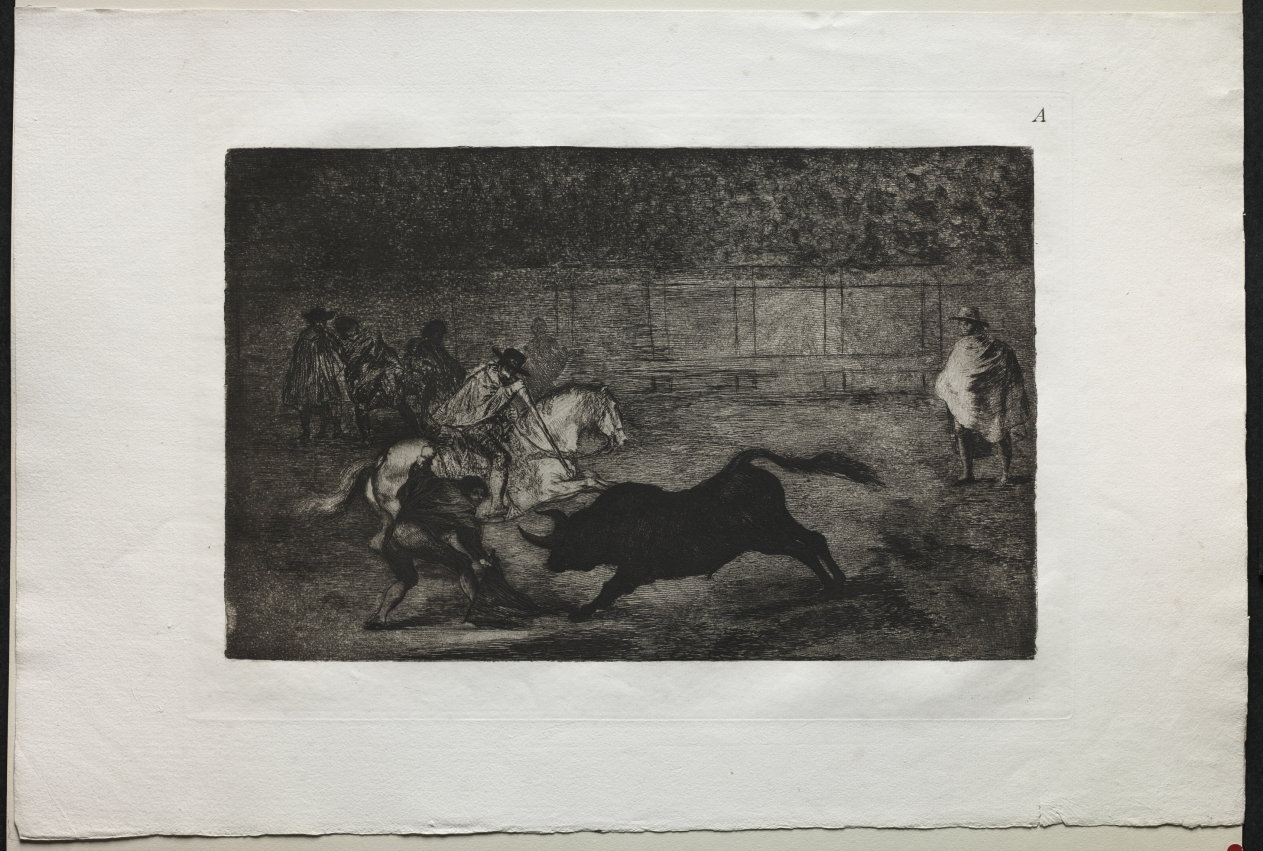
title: Bullfights: A Spanish Mounted Knight Breaking Short Spears with the Help of Assistants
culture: Spain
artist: Francisco de Goya (Spanish, 1746–1828)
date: 1816, printed 1876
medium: engraving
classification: Print